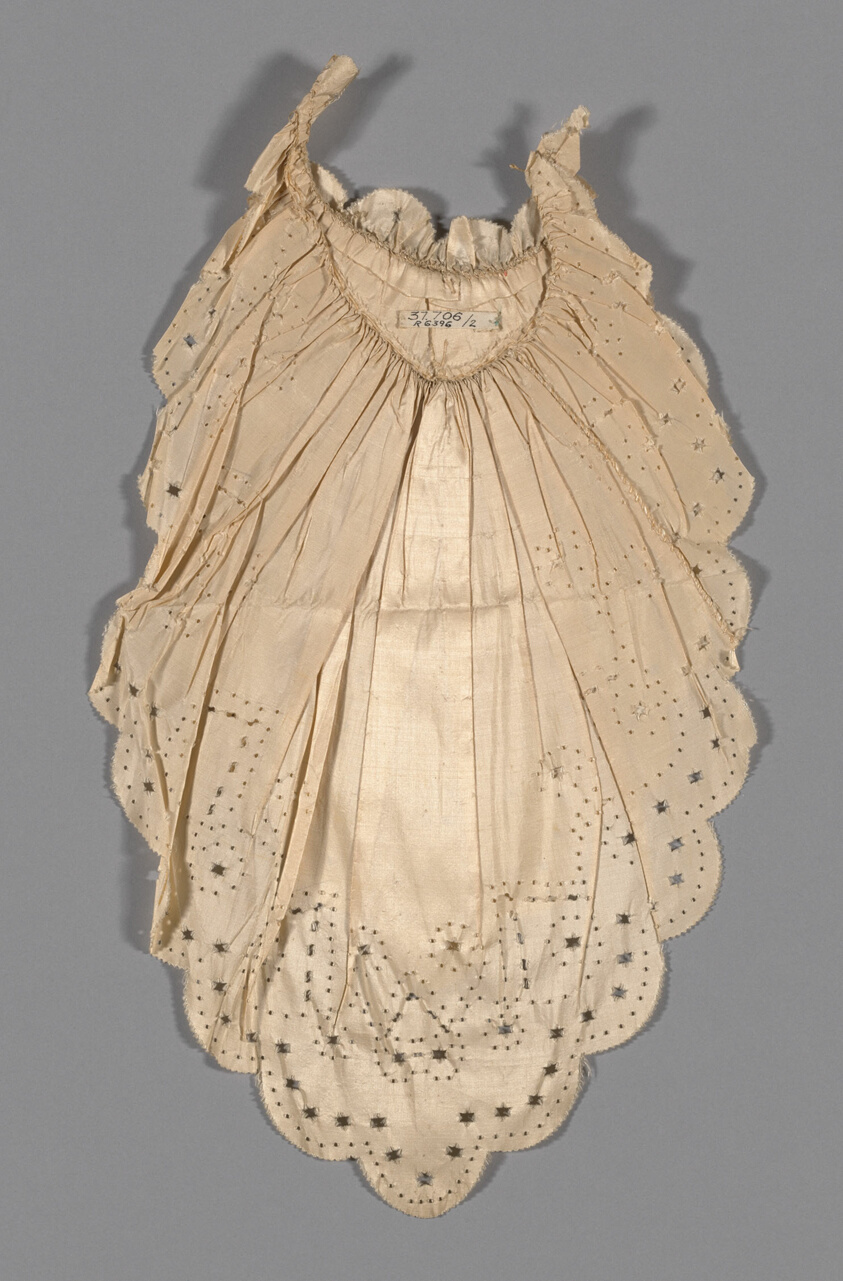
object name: Textile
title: Sleeve Pieces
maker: France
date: 1758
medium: White taffeta with cut work pattern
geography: France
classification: textile; weaving